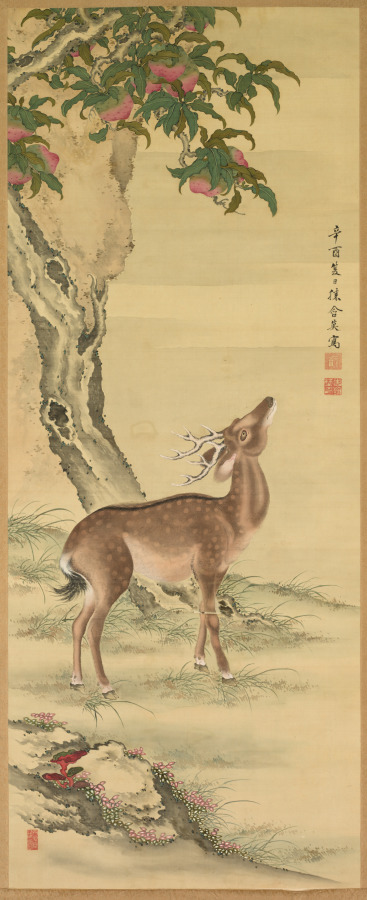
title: Symbols of Longevity: Deer under Peach and Pine (Pine) (right)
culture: Japan, Edo period (1615–1868)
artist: Toda Tadanaka (Japanese, 1761–1823)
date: 1801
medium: Pair of hanging scrolls; ink and color on silk (ivory roller ends)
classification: Painting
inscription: Righthand painting sealed lower right: rectilinear red seal above; unread, square red seal below; unread (a collector's seal)